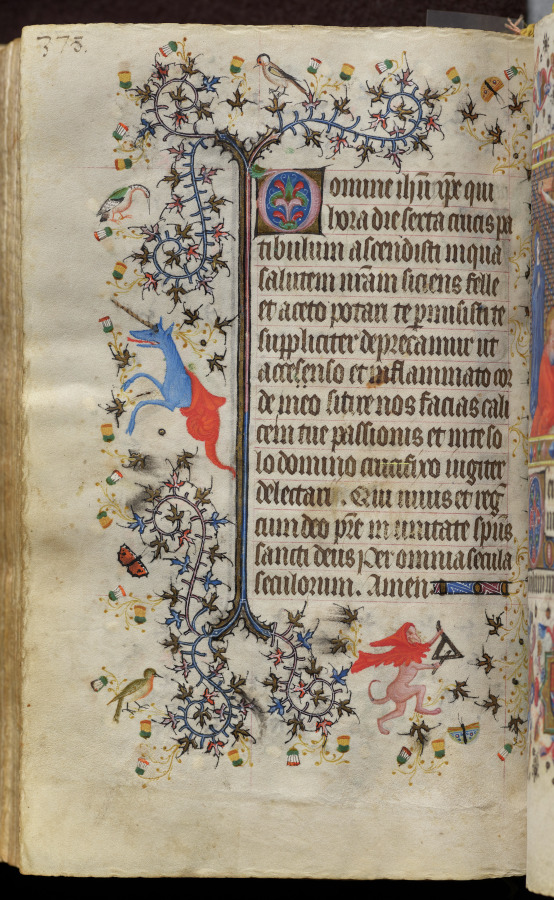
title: Hours of Charles the Noble, King of Navarre (1361-1425): fol. 184v, Text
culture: France, Paris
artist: Master of the Brussels Initials and Associates (French)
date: c. 1405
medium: ink, tempera, and gold on vellum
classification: Bound Volume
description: This precious volume was obviously highly prized by its owner, the French-born King of Navarre, who had his coat of arms painted on no less than twenty folios. Rather than directly commissioning this manuscript from a specific workshop, it seems that Charles the Noble acquired his book of hours -- perhaps ready-made for the luxury market -- while on a trip to Paris in 1404-05. A collaborative effort, six painting styles are evidenced within the pages of this codex, those of two Italians, two Frenchmen, and two Netherlanders. The painter who was responsible for the planning and decoration of the book, and who produced seventeen of the large miniatures, was a Bolognese artist known as the Master of the Brussels Initials. His principal assistant, responsible for most of the borders, was a Florentine who signed his name "Zecho" da Firenze on folio 208 verso.